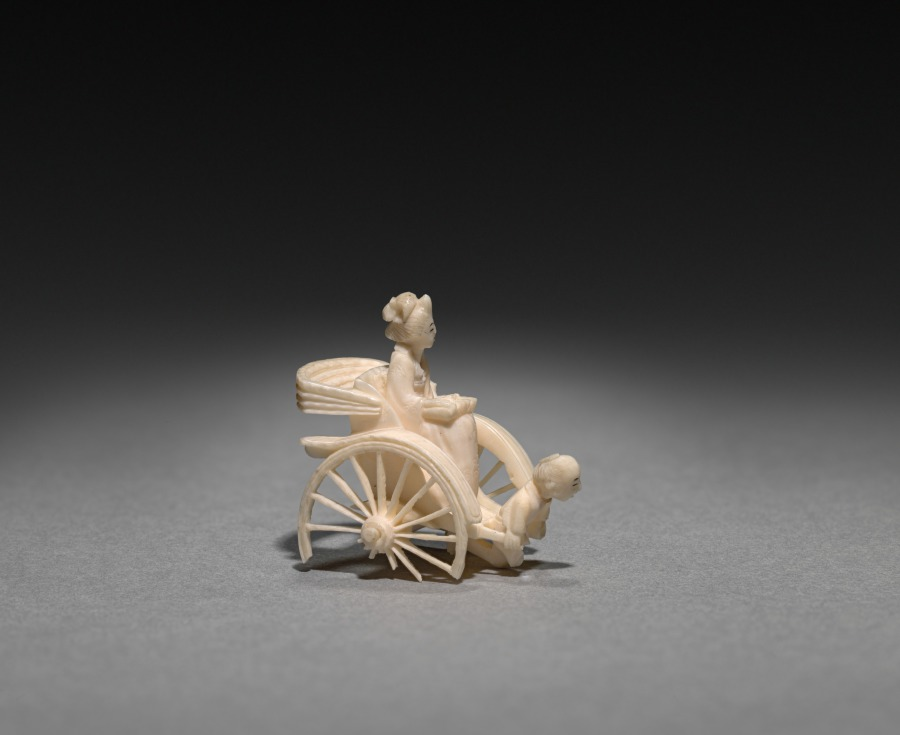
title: Woman in a Jinrikisha (Rickshaw)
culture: Japan, Meiji period (1868–1912)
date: early 1900s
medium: ivory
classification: Ivory